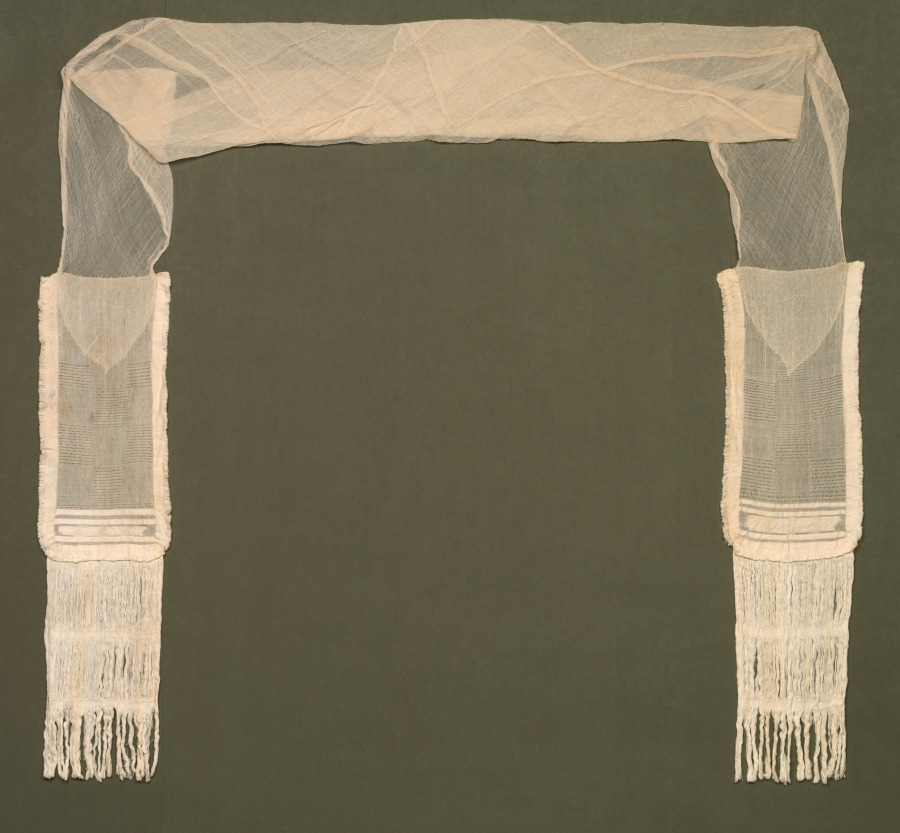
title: Turban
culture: Peru, North Coast, Chimú style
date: 1485–1640 (radiocarbon date, 95.4% probability)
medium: Cotton; plain weave, brocaded and complex alternating gauze with 5 shots of plain weave between gauze shots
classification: Garment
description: Chimú garments like this one consist of a large, rectangular central section—here measuring some 65 inches by 50 inches—with decorated tabs stitched to two opposite corners. Such garments probably were worn as turbans but we do not understand exactly how. For the purpose of display, the plain central section of this example has been folded to form a wide band, with the tabs arranged on either side.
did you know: The white cotton yarns used to make this textile are only 0.1 to 0.2 millimeters in diameter.